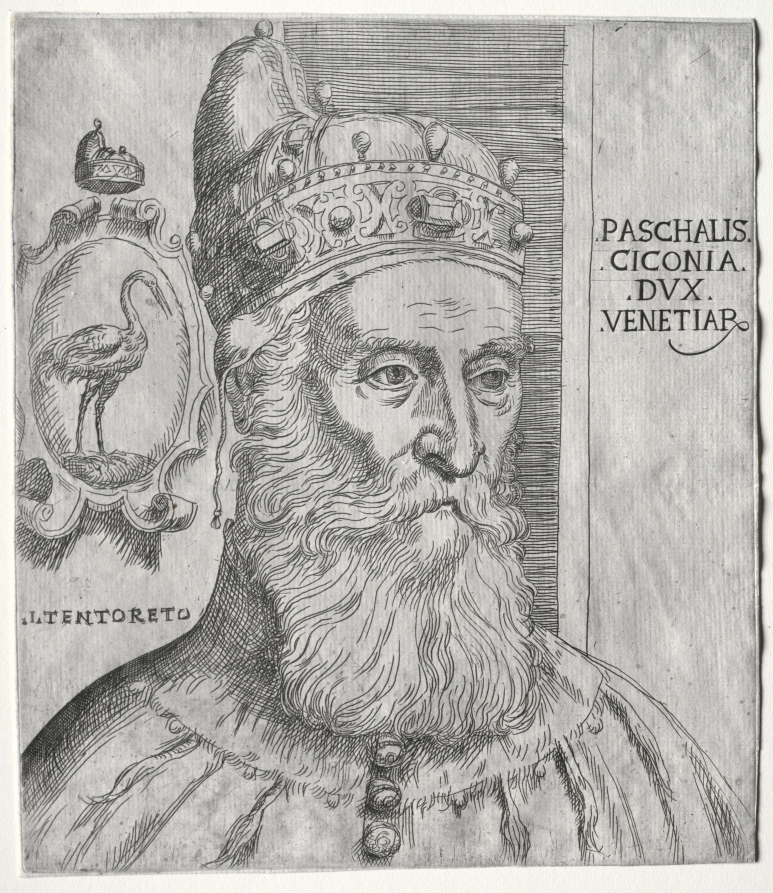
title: Portrait of Pasquale Cicogna, Doge of Venice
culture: Italy, 16th century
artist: Jacopo Palma il Giovane (Italian, c. 1548–1628)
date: c. 1585–1600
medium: etching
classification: Print